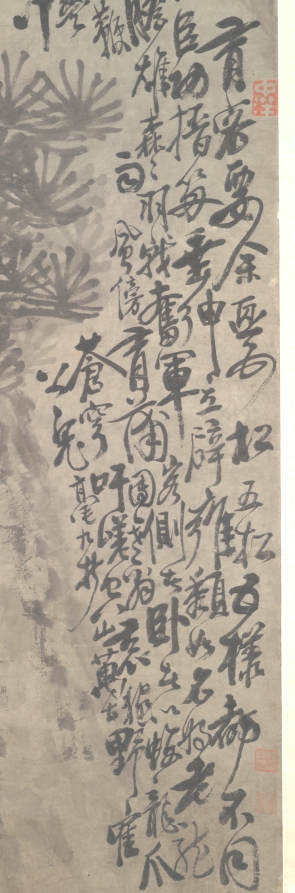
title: Five Pine Trees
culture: China, Qing dynasty (1644–1911), Qianlong reign (1736–95)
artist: Li Shan (Chinese, c. 1686–1762)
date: 1747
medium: Hanging scroll; ink on paper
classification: Painting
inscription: Artist's 5 poems (not translated), inscription, signature, and 4 seals: [seal] Chung-yang. A friend asked me to paint the five pines. I associated the straight pine with a statesman, the bald one with a famous general, the one leaning to one side and the one reclining with dragons, the short round one with foliage like a grass-mat with either an immortal or Buddha. And I composed a long poem as inscription. In autumn, the ninth month of the ting-mao year [1747], the twelfth year of the Ch'ien-lung era, I imitated the style of T'ien-ch'ih sheng [Hsü Wei, 1521-1593], at the Sheng-hsien fu-ou Studio in the southern part of the city. Fu-t'ang, Ao-tao jen, Li Shan. [2 seals] Shan-yin; Tsung-yang. [seal, lower left corner] Fu-t'ang, Li Shan. trans. LYSL/WKH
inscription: 2 additional seals of Cheng Qi 程琦 (1911–1988)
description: Li Shan was born into a family of scholars and officials in Yangzhou. The wealth and status of Li's family assured him an educational and cultural advantage, including his appointment at court. The subjects Li Shan chose to paint—orchids, bamboo, pines, and flowers—reflected his literati background. Five Pine Trees, painted late in his career, is an unconventional work. Rather than having focused on a realistic treatment of the subject, Li created the trees with an interplay of richly modulated strokes, while he utilized a semicursive script among the branches to illustrate the kinship between painting and calligraphy.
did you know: The writing among the branches illustrates the kinship between painting and calligraphy.